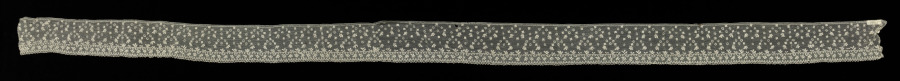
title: Lace Edging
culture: France, Alençon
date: 1760–99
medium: Needle lace (Point d'Alençon)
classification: Lace